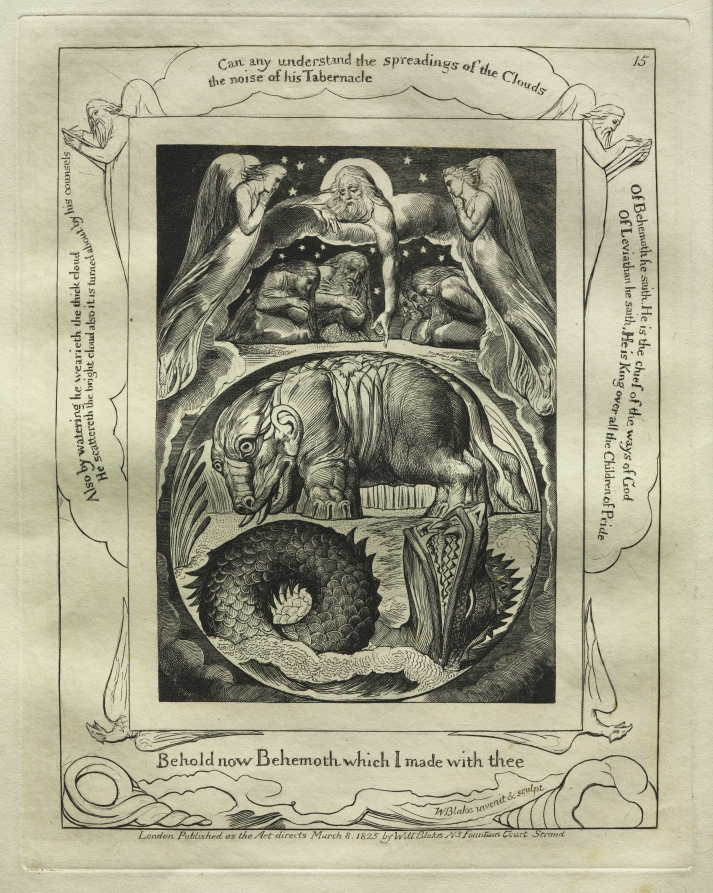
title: The Book of Job: Pl. 15, Behold now Behemoth which I made with thee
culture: England, 19th century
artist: William Blake (British, 1757–1827)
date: 1825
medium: engraving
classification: Print